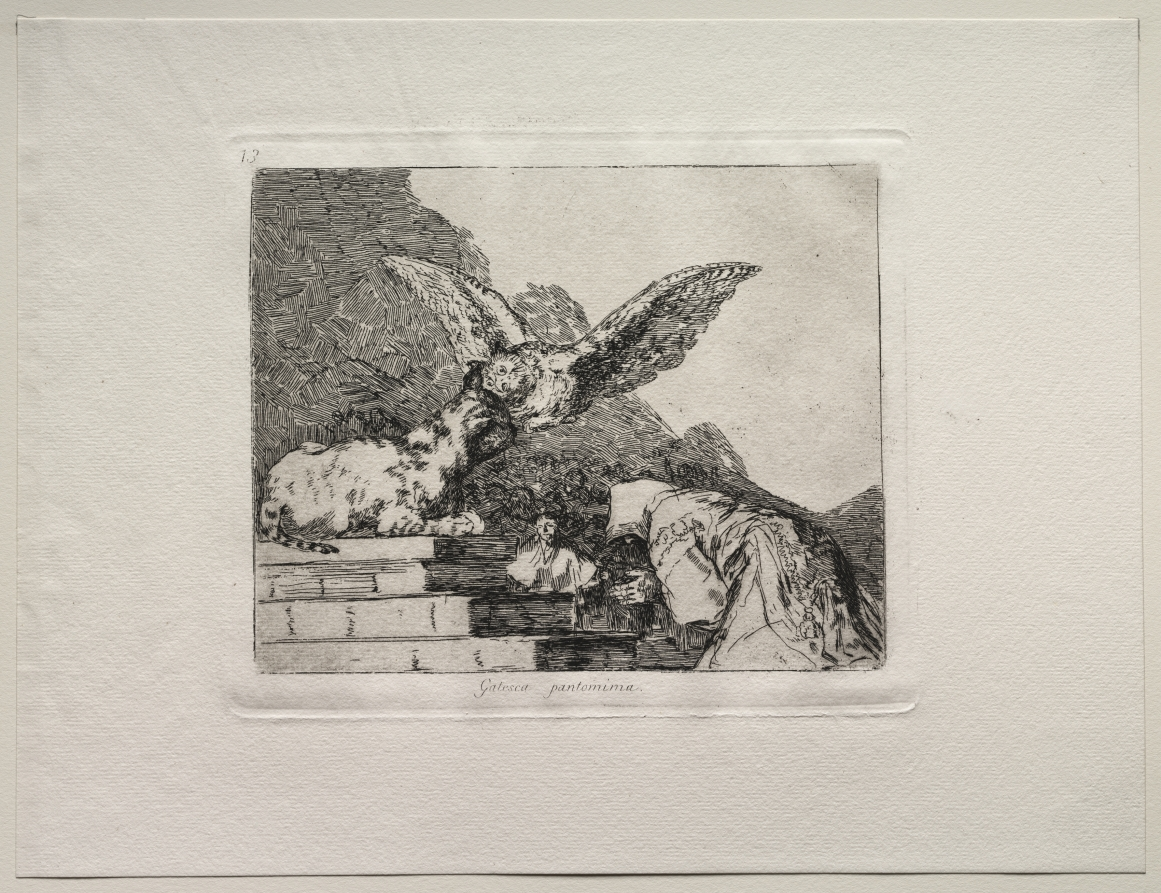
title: The Horrors of War: Feline Pantomime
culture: Spain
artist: Francisco de Goya (Spanish, 1746–1828)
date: c. 1810–20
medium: etching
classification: Print